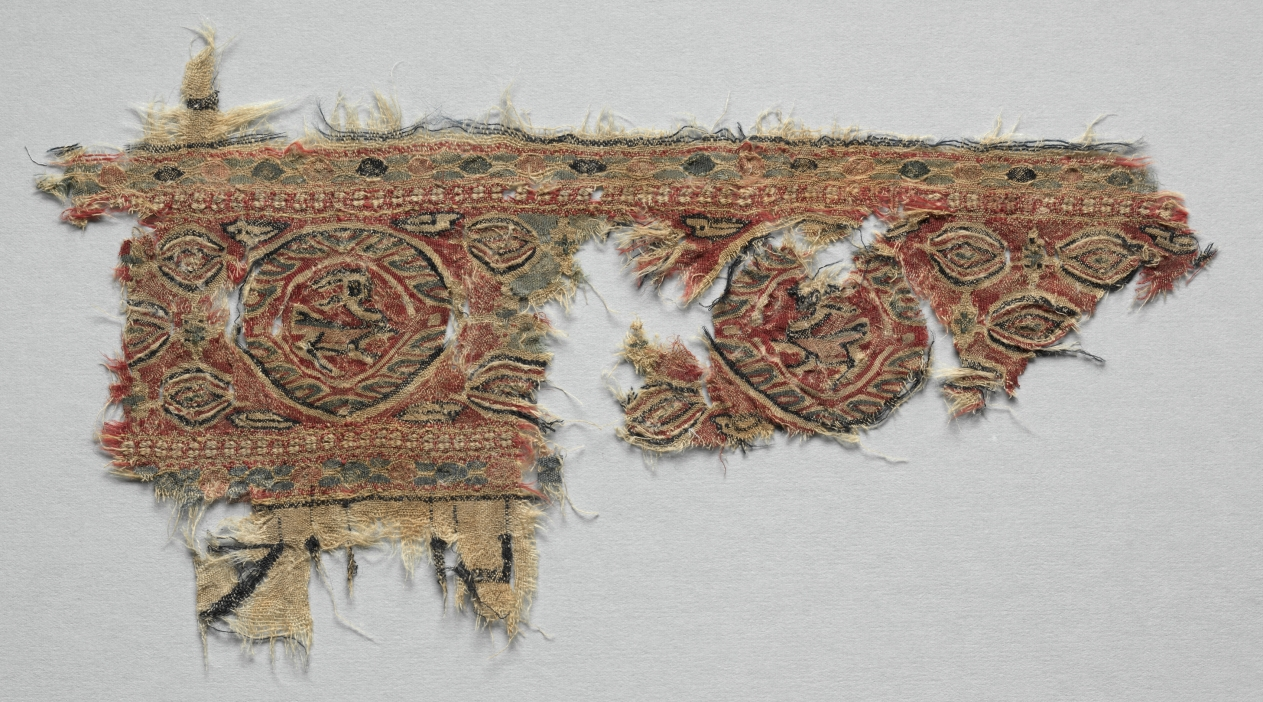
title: Fragment of a Band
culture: Egypt, Umayyad period (661–750) or Abbasid period (750–1258)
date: 600s - 800s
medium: tabby ground, inwoven tapestry ornament; wool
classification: Textile